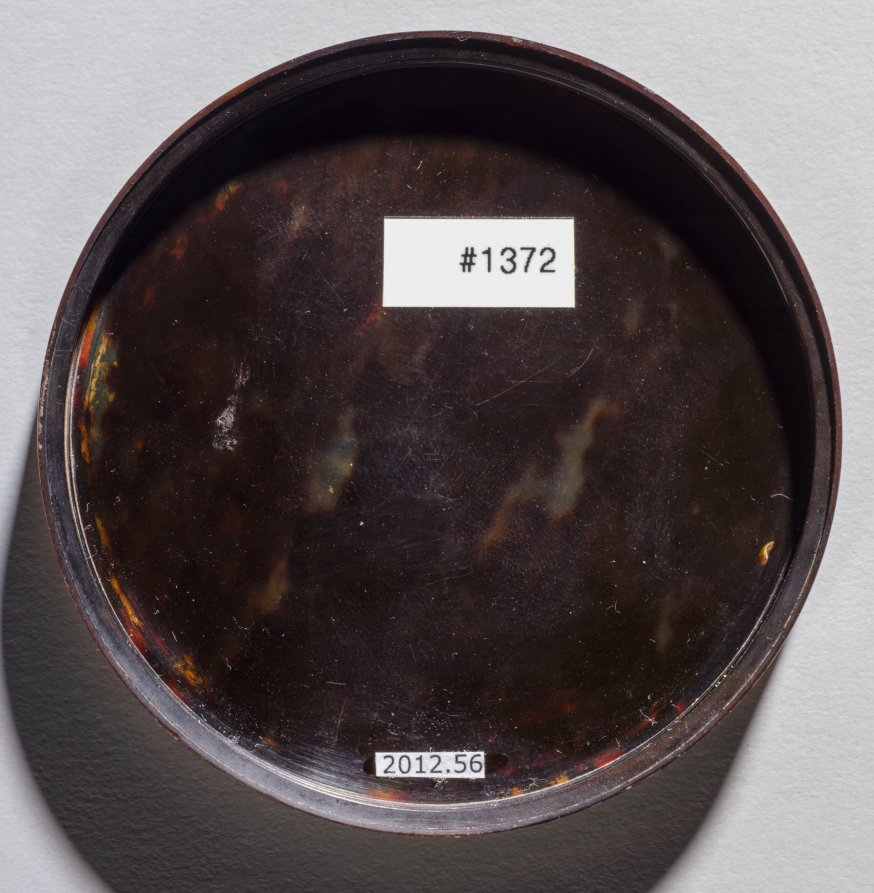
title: Portrait of the Artist's Children Emma and Paul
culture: France, 18th century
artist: Jean-Antoine Laurent (French, 1763–1832)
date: c. 1795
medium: watercolor on ivory, gold mount, set in the cover of a composition bonbonniere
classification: Portrait Miniature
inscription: signed at mid-center "Laurent"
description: This sensitive depiction of his children exhibits Laurent's ability to portray the psychological interiority of his subjects, young or old. The miniature shows Laurent's son and daughter in white chemise gowns with green ribbon accents. They both have striking blue eyes and slightly curled blond hair. The younger sibling tenderly holds the arm of the older one, who sits on a chair strewn with pink rose petals and inscribed with the artist's signature. The children are placed within an environment in which green foliage sprouts small blue and purple flowers. This organic setting reflects 18th-century Western philosophies of natural child rearing, characterized by treating childhood as a period of innocence distinct from adulthood and advocating that children not be treated as miniature adults but instead should have their naiveté celebrated. This philosophy influenced children's clothing. Instead of dressing children as small adults in constrictive costumes, both genders wore loose chemises, like the ones seen here, that encouraged mobility.